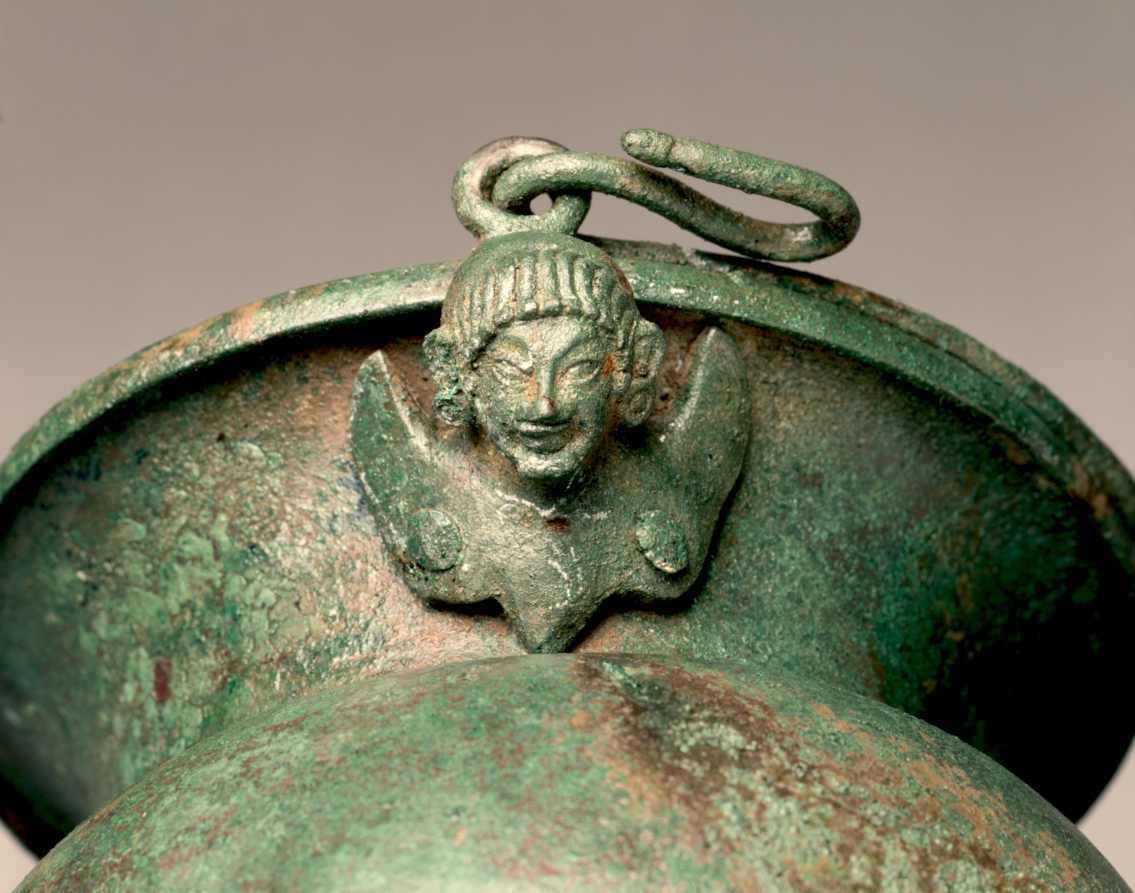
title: Situla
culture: Etruscan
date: c. 525–450 BCE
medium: bronze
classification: Metalwork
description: Known as a situla, or bucket, this bronze vessel features an ovoid body with a flaring neck. The separately made foot is quite elaborate and unusually shaped for this type of vessel. More typical is the handle, designed to swing upward from its two attachments, each finely cast in the form of a frontal siren with earrings and very small, simplified wings.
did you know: The handle includes a loop with attached chain, perhaps meant for hanging.